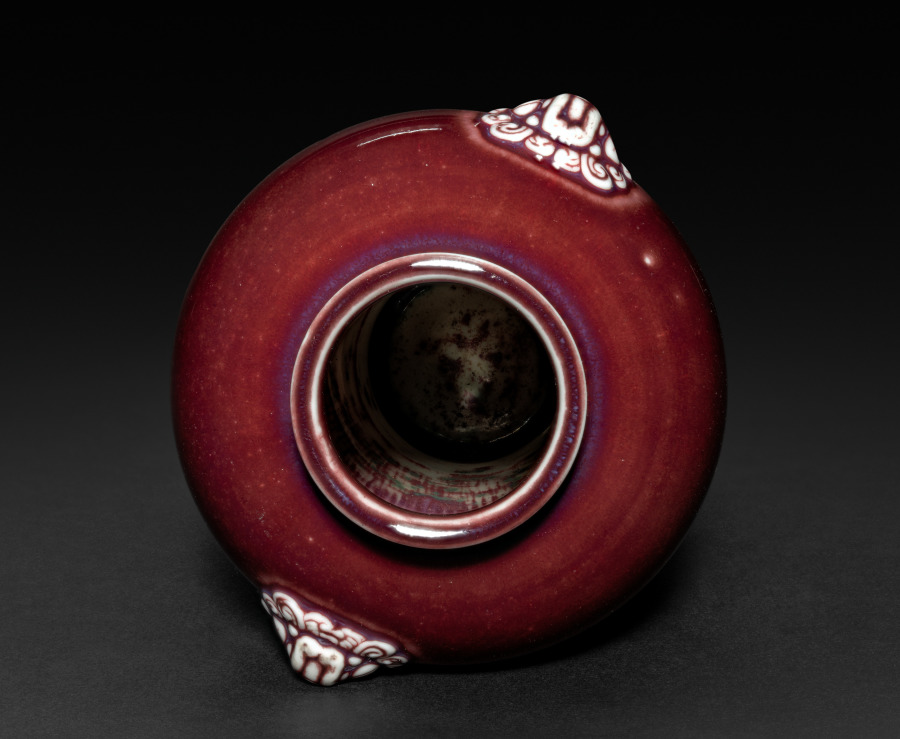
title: Single Stem Vase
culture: Japan, Taishō period (1912–26)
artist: Seifū Yohei IV (Japanese, 1872–1951)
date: 1914–46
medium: Porcelain with molded design and copper-red glaze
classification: Ceramic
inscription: 清風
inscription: 清風造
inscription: 成山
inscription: 清風盧人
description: This vase is copper red in color at the top and becomes purple closer to the bottom, not unlike a Chinese transformation or flambé glaze with mottling and dripping of the glaze. The lip of the vase and much of the lion-head designs remain white. On the box lid, the color of the glaze is called shinsha, which is often glossed as copper red or oxblood, or sometimes cinnabar. Here, it is meant to refer to a Qing-dynasty glazing technique developed in an effort to reproduce a red glaze used during the reign of the Xuande emperor (1426–35) of the Ming dynasty.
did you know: This vase has lion heads for “ears."